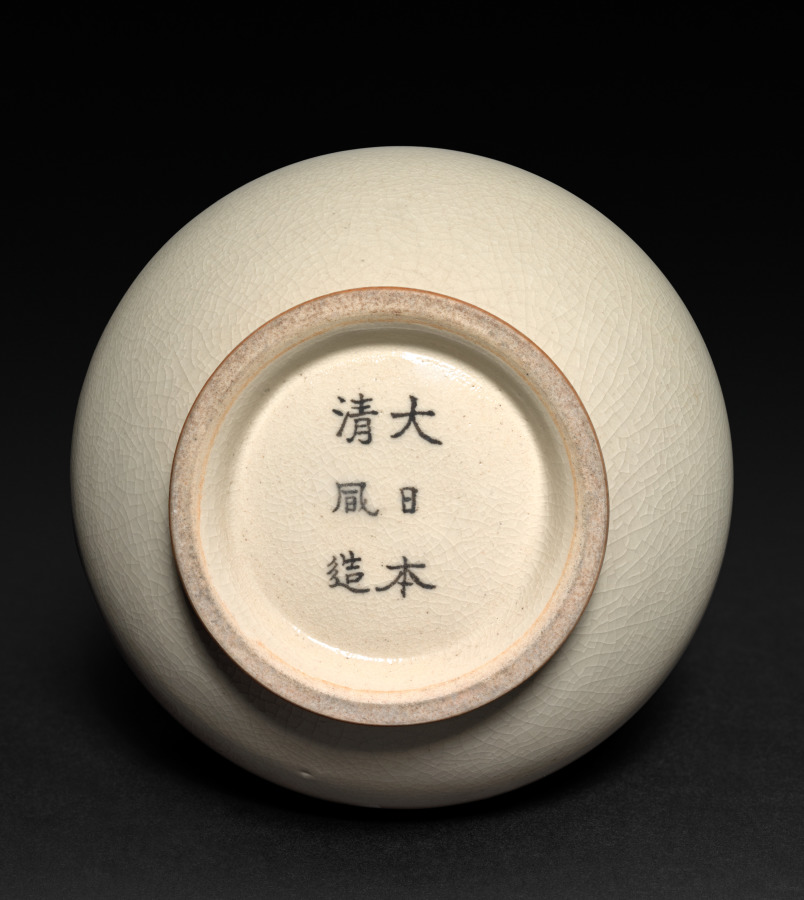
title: Long-Necked Vase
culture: Japan, Meiji period (1868–1912)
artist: Seifū Yohei III (Japanese, 1851–1914)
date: 1893–97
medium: Stoneware with crackled glaze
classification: Ceramic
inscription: 大日本清風造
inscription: 帝室技芸員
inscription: 清風盧人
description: The glazing of this long, narrow-necked and bulbous-based vase has a network of shallow cracks, created when the glaze fractured as it cooled from firing. It is called a cracked-ice pattern or glaze, since the effect resembles the surface of a frozen lake. The cracks here are of a consistently high density throughout the vessel. This pattern is observed also in the transparent glaze of some Kyoto ware, in some of Yohei III’s green glazes, and in some of his vessels emulating Chinese forms. The interior of the box lid has an attestation to its authenticity by Yohei IV, and the footring is inscribed Seifū of Great Japan (Dai Nihon Seifū) in iron black.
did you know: Seifū Yohei III apprenticed in the Seifū studio, married into the family, and later adopted the Seifū Yohei name, when he became head of the studio.